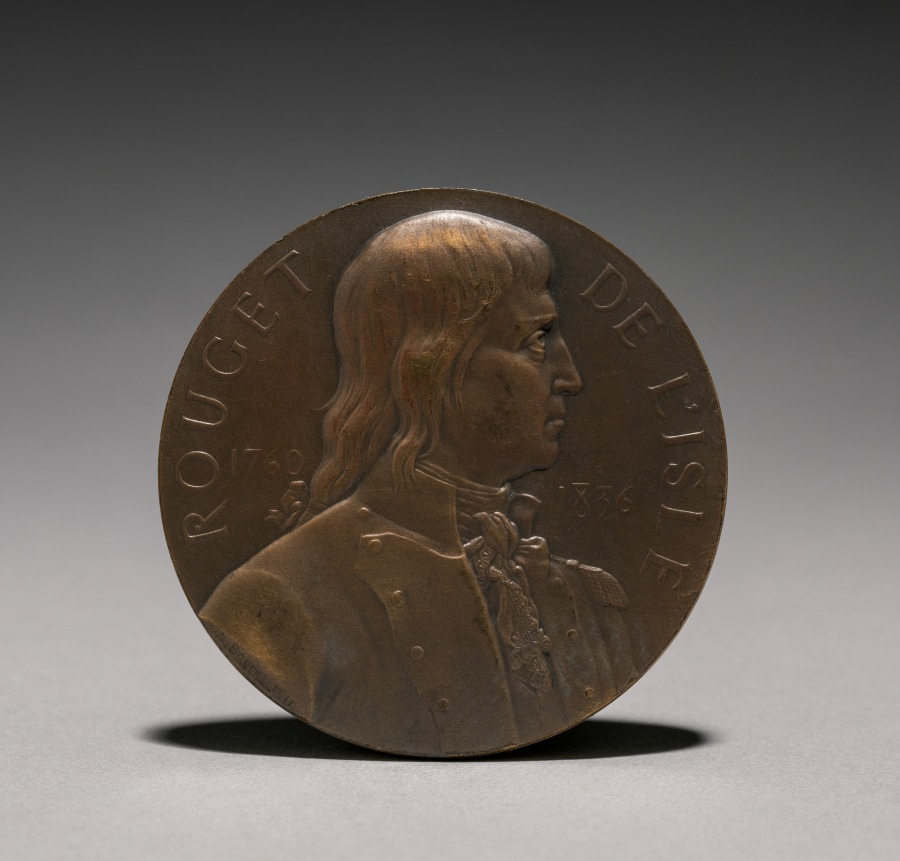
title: Medal of Claude Joseph Rouget de L'Isle (1760-1836) (obverse)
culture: France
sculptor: Alfred Borrel (French, 1836–1927)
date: 1911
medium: bronze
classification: Metalwork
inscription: Obverse: raised inscription: ROUGET DE L'ISLE 1760 1836; inscribed lower left: A. BORREL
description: The French sculptor and medalist Alfred Borrel (1836-1927) created this portrait medal to commemorate the 75th anniversary of Rouget de L'Isle's death in 1836, the same year in which the sculptor was born.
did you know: Claude Joseph Rouget de L'Isle composed the French national anthem, La Marseillaises, in 1792 in Strasbourg after France had declared war on Austria.